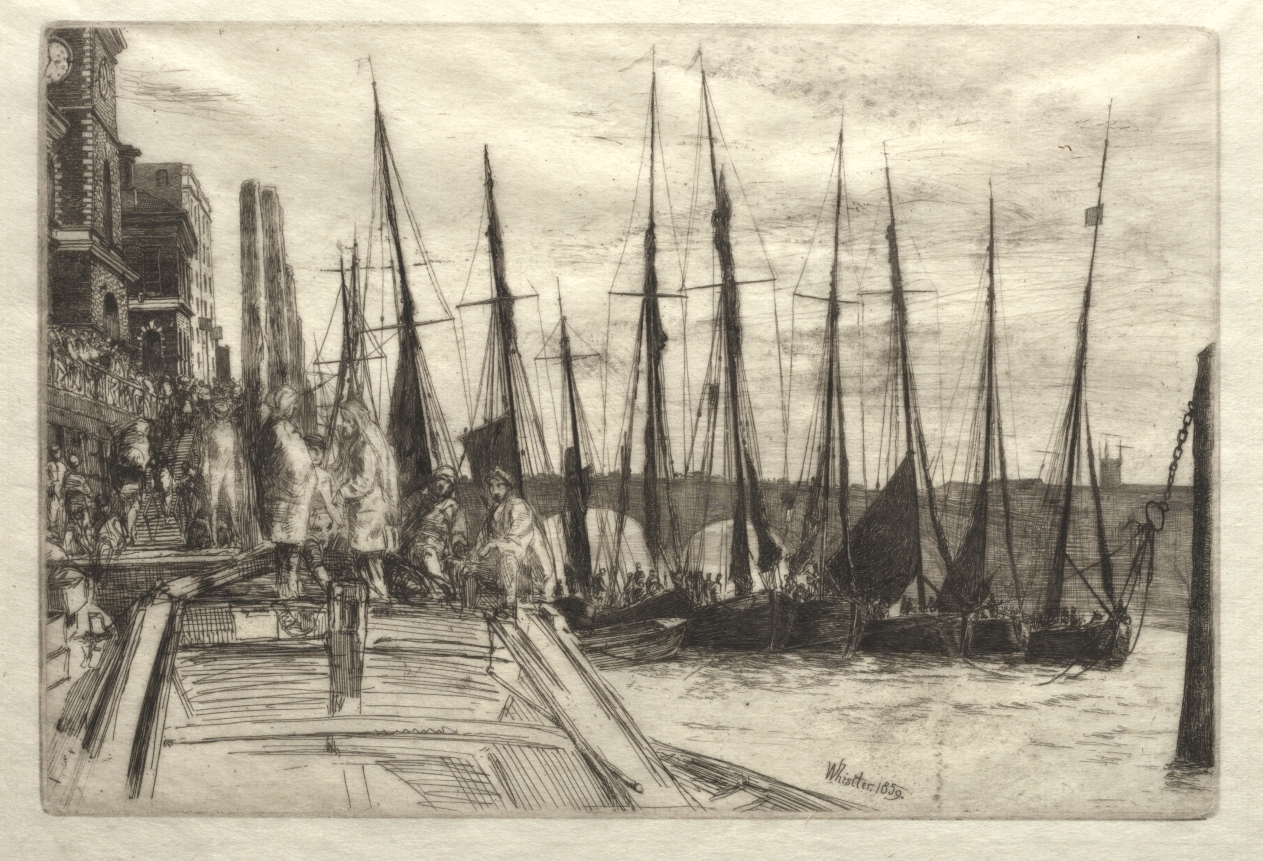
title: Billingsgate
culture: America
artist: James McNeill Whistler (American, 1834–1903)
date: 1859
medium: etching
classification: Print